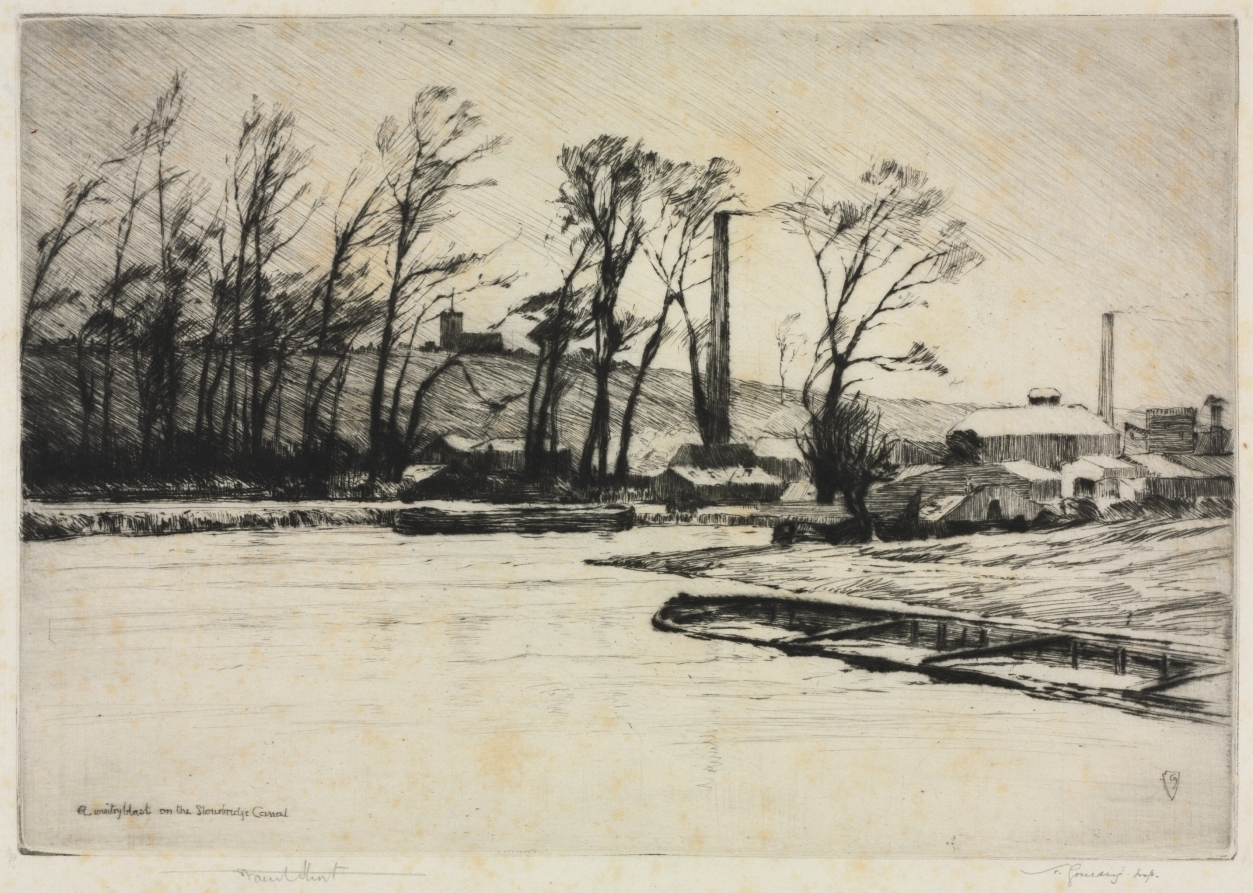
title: A Wintry Blast on the Stourbridge Canal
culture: England, 19th century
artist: Frank Short (British, 1857–1945)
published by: Print Collectors' Club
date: 1890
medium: drypoint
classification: Print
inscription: Lower right, in pencil, signed by the artist and his printer: "Frank Short Goulding imp." Inscribed lower left in plate: "A Wintery Blast on the Stourbridge Canal"